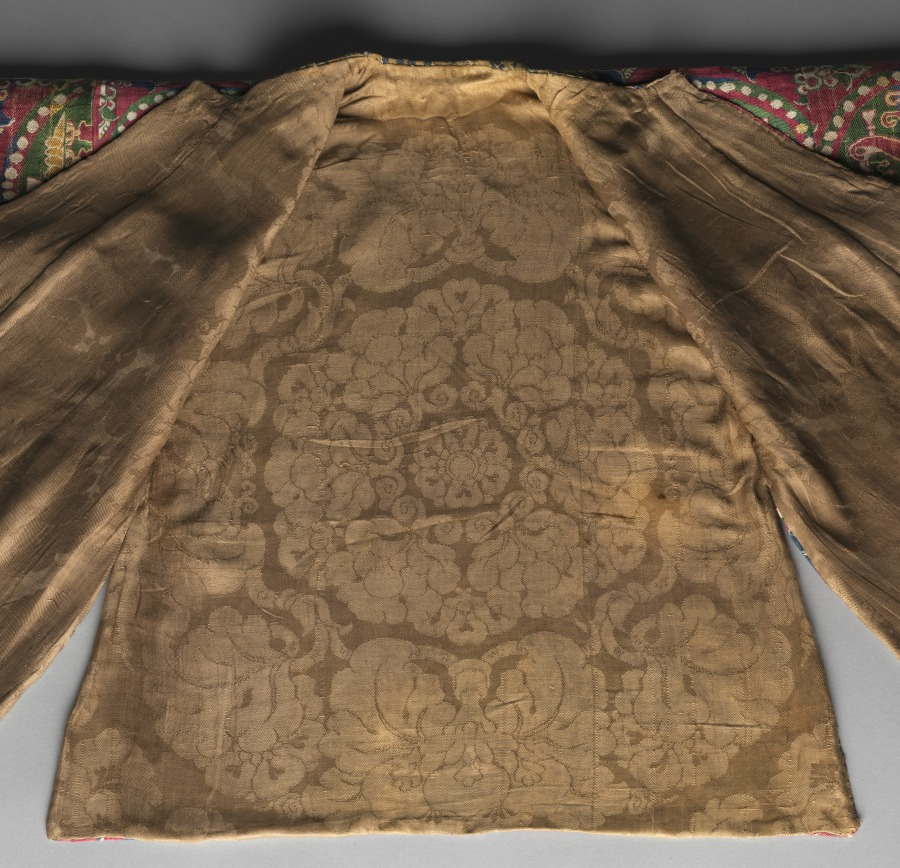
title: Child’s Coat with Ducks in Pearl Medallions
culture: Probably Sogdia (present-day Uzbekistan); China, Tang dynasty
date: 700s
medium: Silk: weft-faced compound twill weave (samite)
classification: Garment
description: The coat’s outer fabric is woven in five brilliant colors featuring paired ducks in pearl roundels, hallmarks of the precious and highly desired silks from Sogdia. The coat’s inner lining is a twill damask with a floral pattern made in China. The combination of Sogdian and Chinese silks in one garment with Tibetan ownership history is evidence of the vital exchange and cultural interaction among the peoples living along the trade routes of the Silk Road. This precious coat was presumably made for a Tibetan prince. Given the coat’s pristine condition, though, it is unclear whether the garment was ever worn, or was used as a diplomatic gift or perhaps as currency.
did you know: This coat is part of a set of garments that originally included an outer pair of pants and silk boots made from the same fabric.